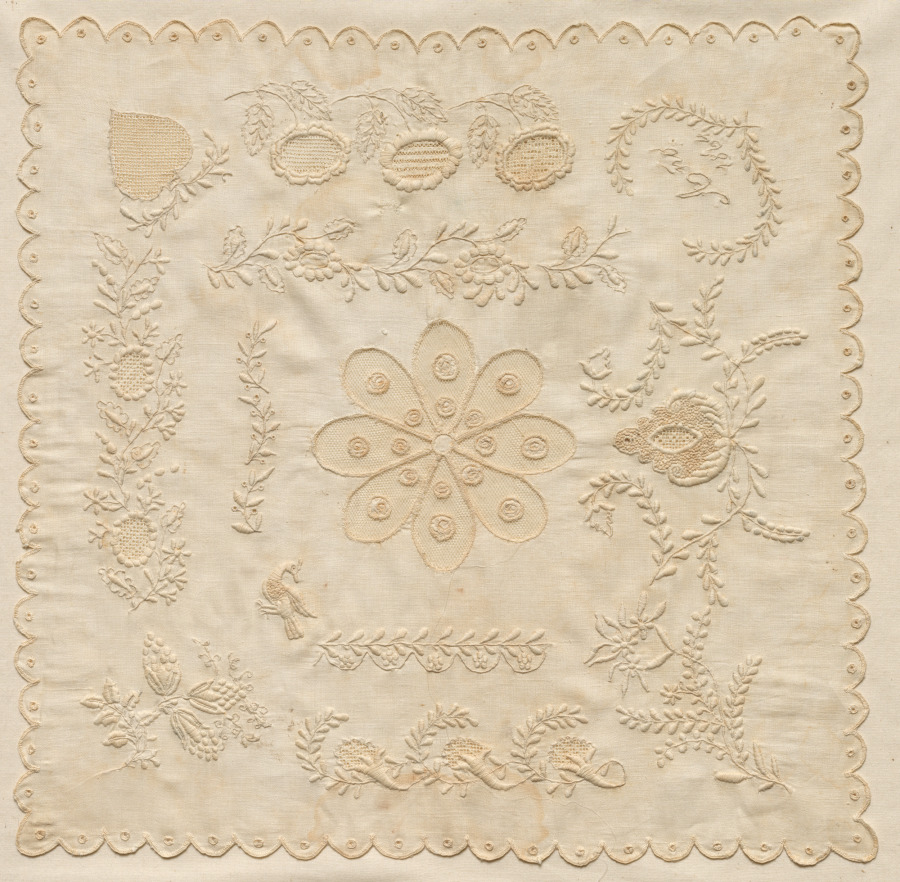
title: Sampler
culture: Mexico, 19th century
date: 1864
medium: embroidery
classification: Sampler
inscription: enclosed in wreath: "Año 1864."